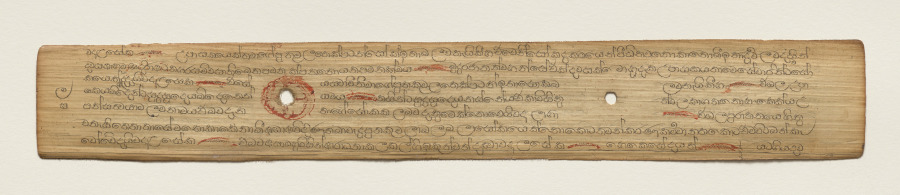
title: Leaf from a Buddhist Manuscript (recto)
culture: Sri Lanka, Singhalese, Late 17th century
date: c. 1700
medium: fiber paper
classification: Manuscript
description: Palm leaf material is still used for manuscripts in Sri Lanka. The palm leaves are prepared first by boiling them, drying them in the sun, and then rubbing them with oils. Scribes then use a metal stylus to incise the text. Then charcoal powder is wiped across the pages, filling in only the inscribed lines.